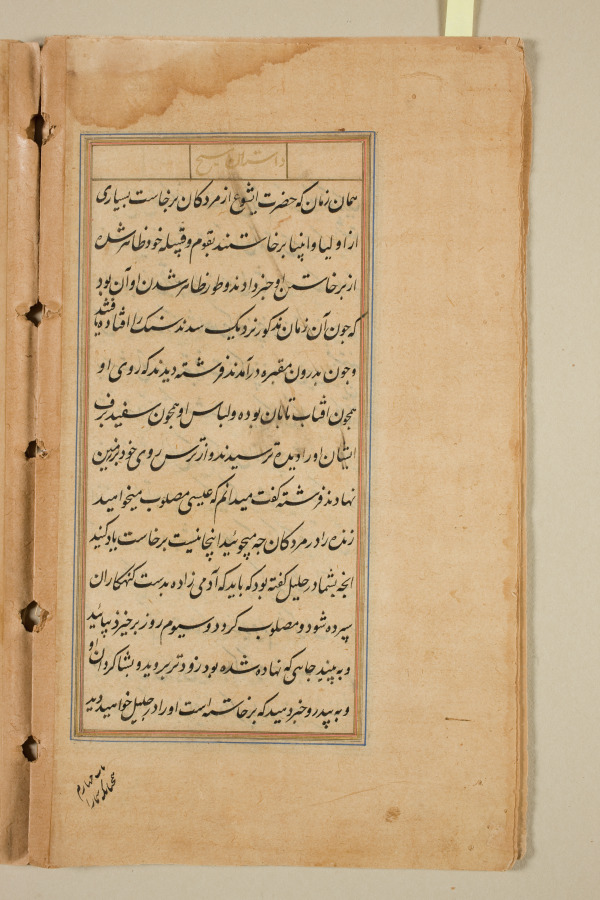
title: Text page from a Mirror of Holiness (Mir’at al-quds) of Father Jerome Xavier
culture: Mughal India, Allahabad, made for Prince Salim (1569–1627)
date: 1602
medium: Ink and gold on paper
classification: Manuscript